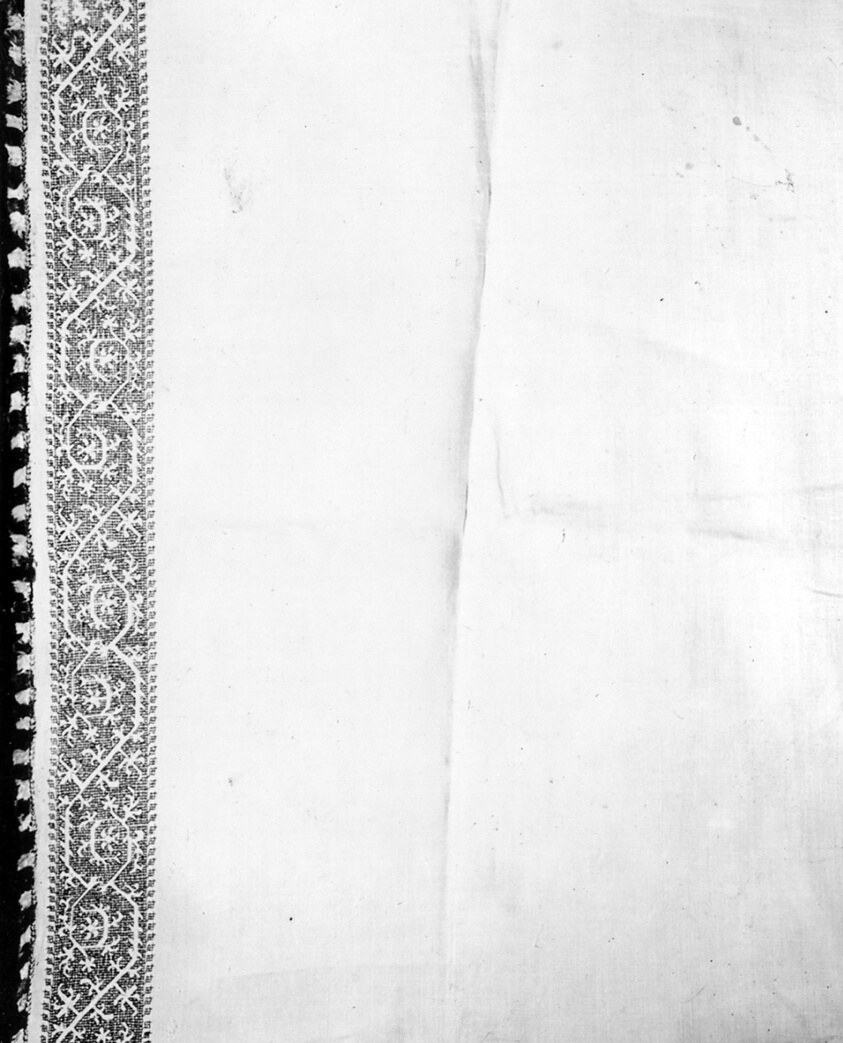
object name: Textile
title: Cover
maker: Italy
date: 17th century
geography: Italy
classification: textile; needlework (visual works)